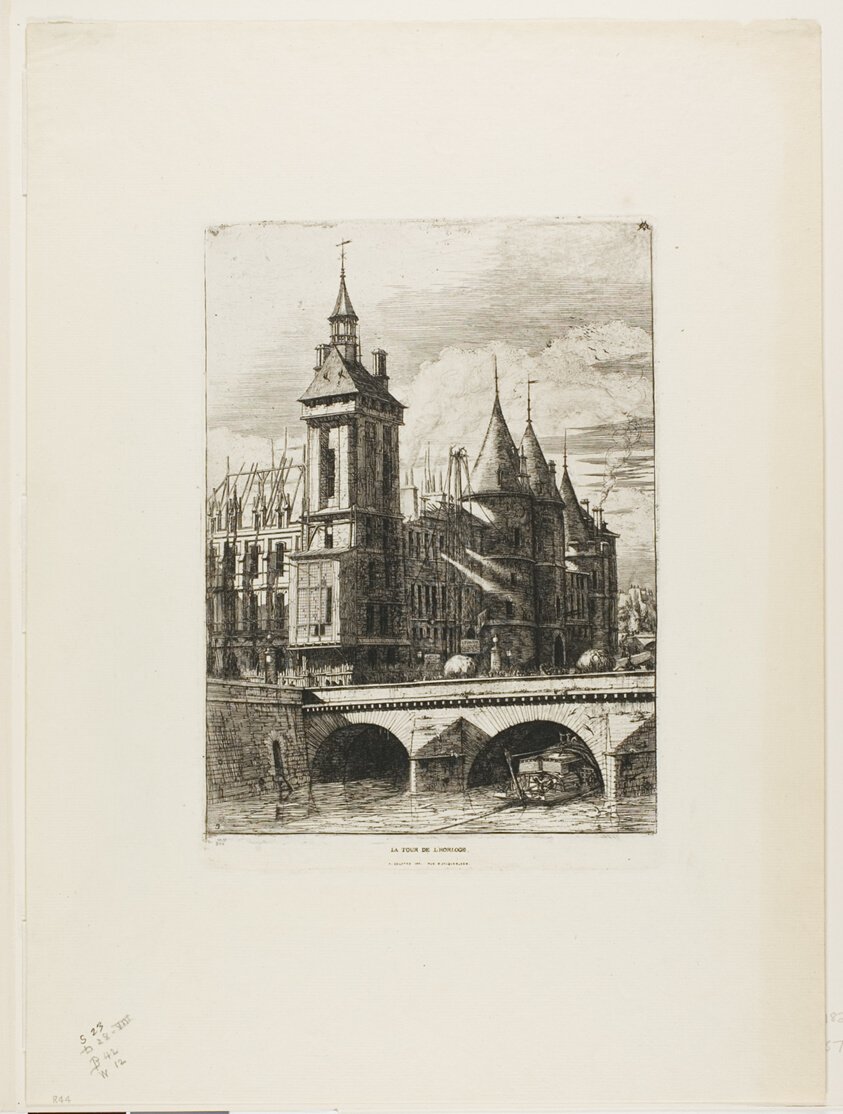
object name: Print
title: The Clock Tower, Paris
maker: Charles Meryon (French, 1821-1868); printed by Auguste Delâtre (French, 1822-1907)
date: 1852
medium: Etching, engraving and drypoint (plate has been scraped and burnished) on ivory wove chine, laid down on ivory laid paper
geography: France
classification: etching; print; prints and drawing